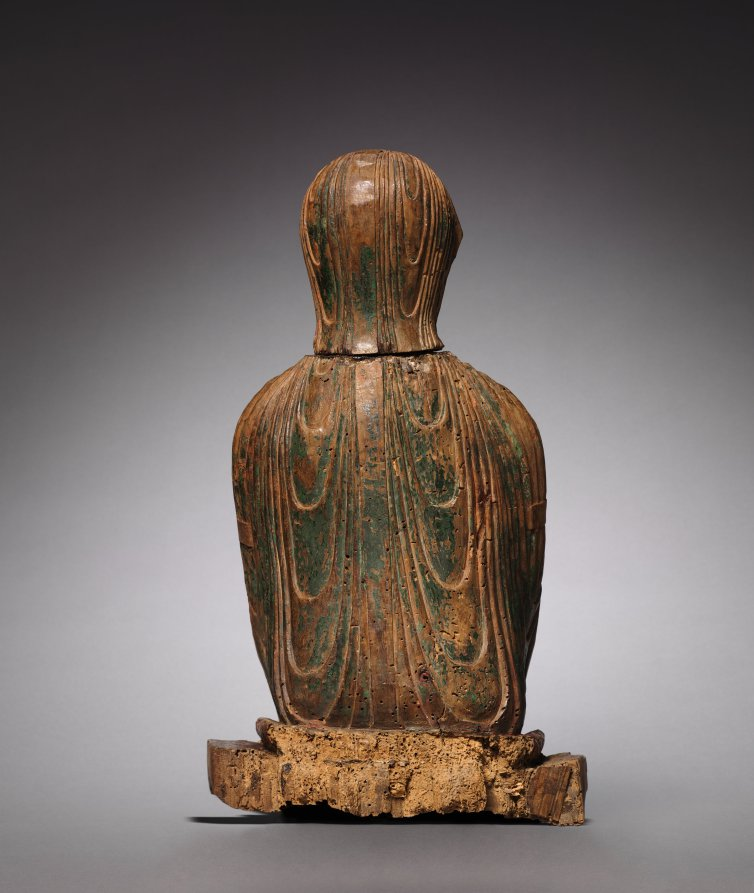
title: Virgin and Child in Majesty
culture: France, Auvergne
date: c. 1150–1200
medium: polychrome wood (walnut)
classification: Sculpture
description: This sculpture belongs to a group of early representations of the Virgin and Child known as the Sedes Sapientiae (the Throne of Wisdom). The subject embodies a complex and core Christian doctrine of the Virgin’s role in the Incarnation (the moment in which Christ became flesh) and ultimately in the redemption of humankind. Mary faces forward, her gaze toward the beholder. As she is seated on a throne, she in turn becomes the throne to the Christ child, thus symbolizing her role in giving birth not only to the human Jesus, but also to the divine Christ. The Incarnation gave Mary a unique role as principal mediator between heaven and earth, and between God and humankind. As a result, her image proliferated in art, especially after the 12th century, a period in which there was surging interest in Mary’s life and increasing devotion to her person and images. The sculpture belongs to a rare group of surviving figures produced in the Auvergne region of central France during the second half of the 12th century. These "Auvergne" Virgins are estimated to number only about 25 or 30 and are characterized by their linear, calligraphic draperies, which form beautiful swirls and contours. All such sculptures are smaller than life-size and made of wood in order to make them mobile. Evidence suggests that they were moved from altar to altar or church to church, and were frequently carried in procession within churches and town streets on Marian feast days. The heads were intentionally removable in order to "dress" them in costumes for such processions.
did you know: In this sculpture of Mary and Jesus, their heads are detachable.